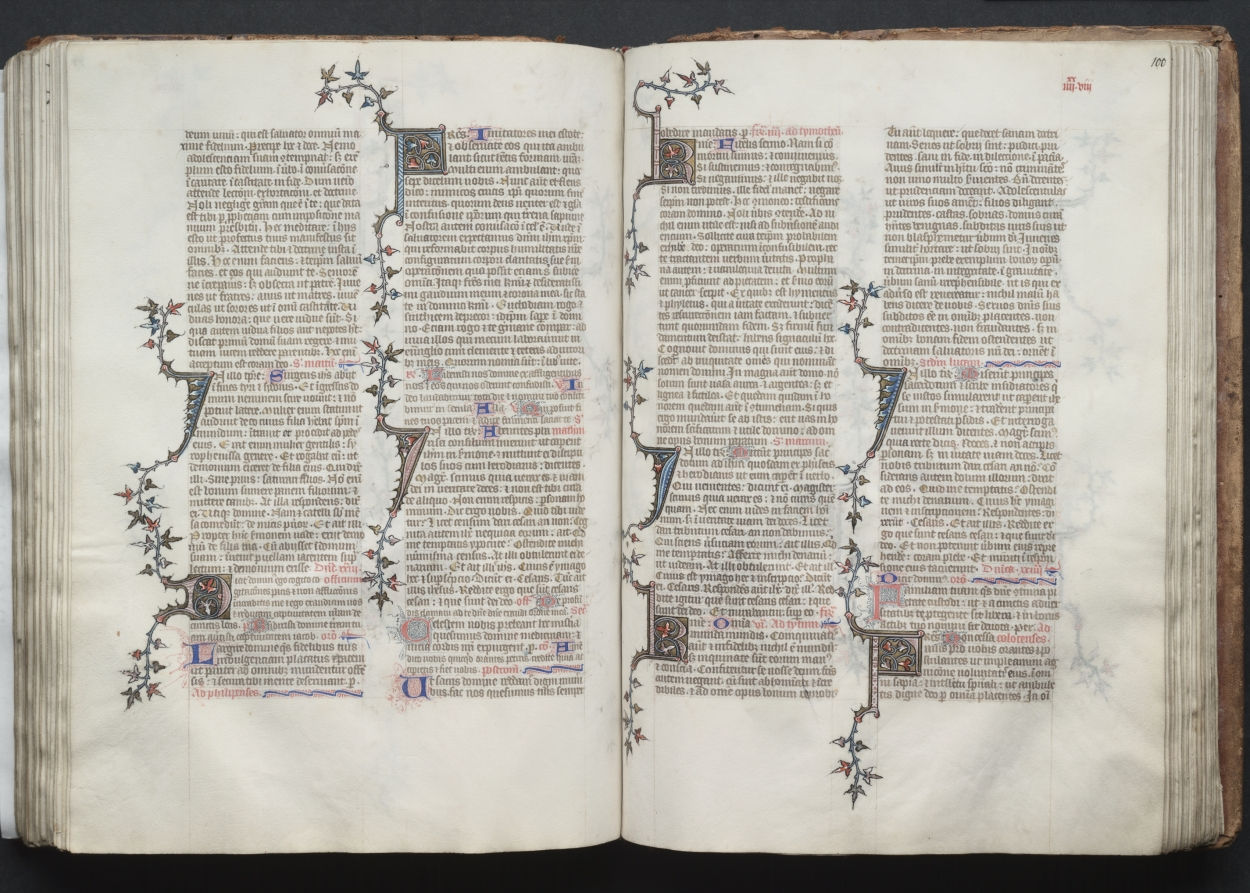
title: The Gotha Missal: Fol. 99v, Text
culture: France, Paris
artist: Master of the Boqueteaux (French)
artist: and Workshop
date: c. 1375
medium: ink, tempera, and gold on vellum; blind-tooled leather binding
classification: Bound Volume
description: The style and quality of this manuscript's decoration is typical of deluxe Parisian books made for aristocratic or royal patrons. Most of the book's decoration appears to be the work of the Master of the Boqueteaux, an artist active at the court of King Charles V (died 1380). His style was apparently shared by a number of book illuminators working in and around Paris. It is very possible that the Gotha Missal belonged to Charles V, but is not provable because the manuscript has no royal portraits and lacks a colophon. Given the book's magnificent decoration, however, it would seem that it was produced for a Valois prince, if not for the king himself. The manuscript receives its name from the German dukes of Gotha, its later owners.